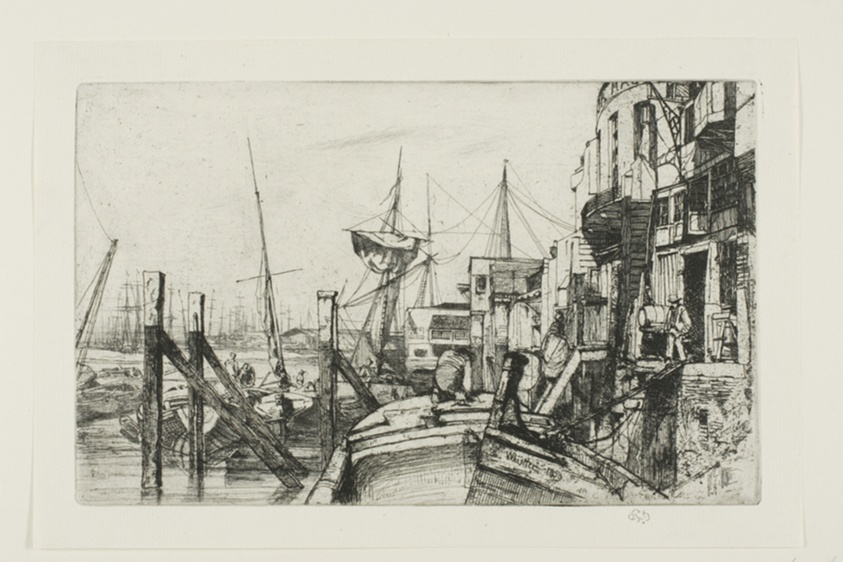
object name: Print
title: Limehouse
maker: James McNeill Whistler (American, 1834-1903)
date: 1859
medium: Etching and drypoint with foul biting in black ink on cream laid paper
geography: United States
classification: etching; foul biting; print; prints and drawing; paper; drypoint